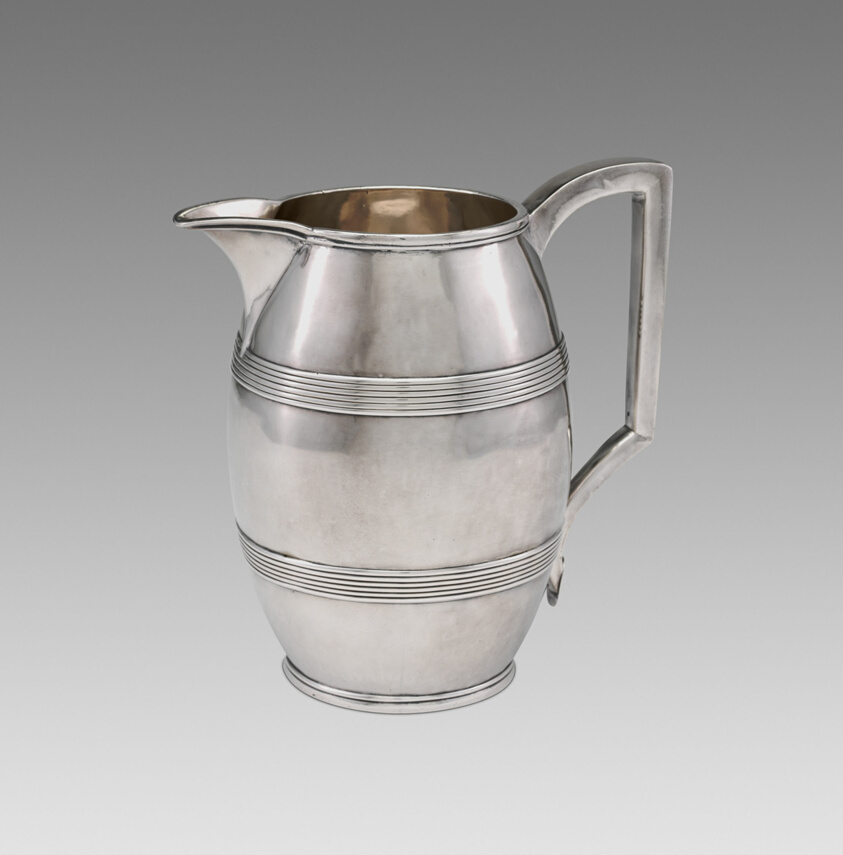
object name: Metalwork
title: Pitcher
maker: Ebenezer Moulton; American, 1768–1824; Boston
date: 1806–20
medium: Silver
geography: Boston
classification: pitcher (vessel); vessel; silver; american decorative arts; american arts; decorative arts